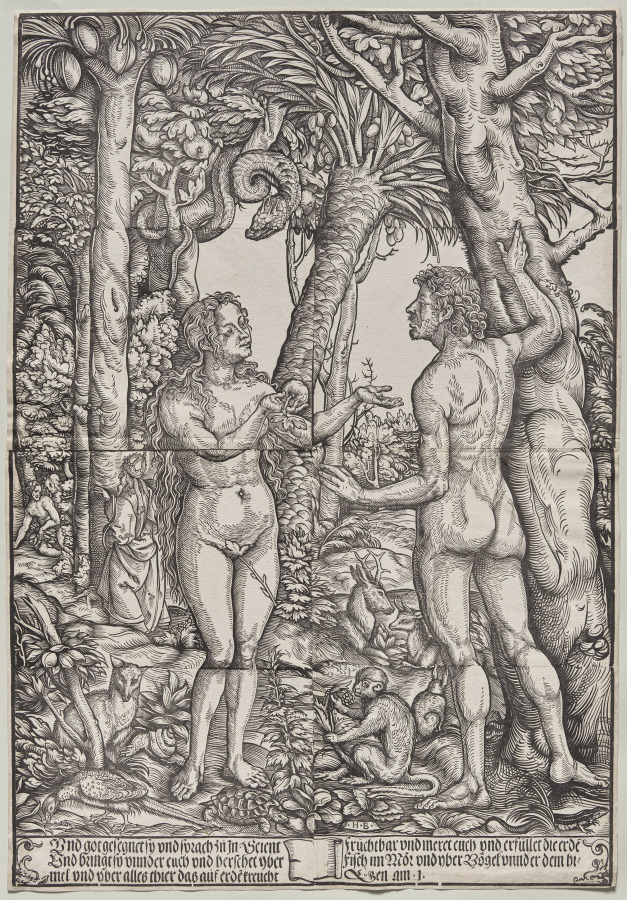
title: The Fall of Adam and Eve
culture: Germany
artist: Hans Burgkmair (German, 1473–1531)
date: 1525, printed later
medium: woodcut on eight sheets of paper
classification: Print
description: This story of Adam and Eve occurs in a tropical location, placing the Garden of Eden closer to what viewers may have believed to be its true location. Palm trees were also associated with human virtues in devotional literature of the time. The artist’s version of the Genesis story places the blame for human transgression squarely on Eve, who appears to persuade Adam to partake of the fruit, while a monkey, a symbol of bodily pleasure, mimics the humans by bringing fruit to its mouth. Since they were often hung on walls, like paintings, prints of this size rarely survive.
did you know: In this second state of the print, Eve's nudity was covered with an olive leaf.